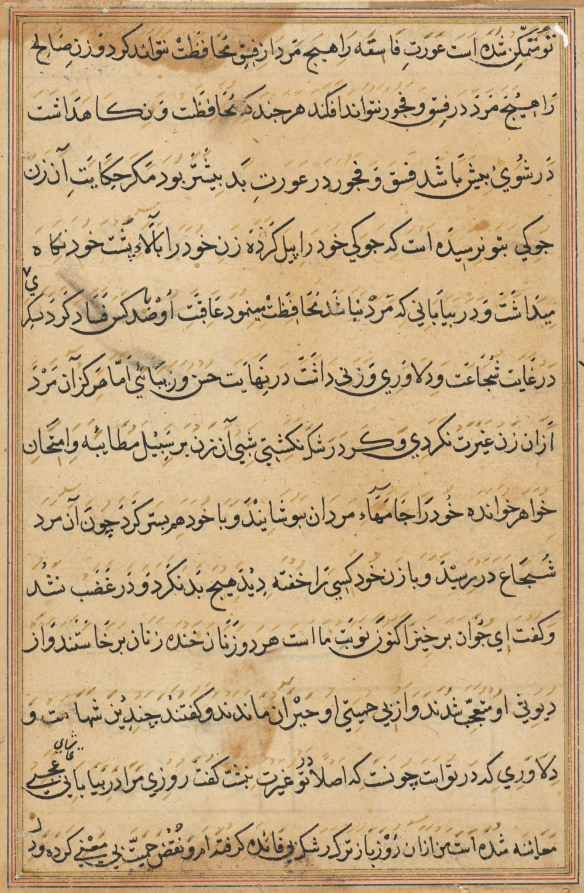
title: Page from Tales of a Parrot (Tuti-nama): text page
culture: Mughal India, court of Akbar (reigned 1556–1605)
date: c. 1560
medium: gum tempera, ink, and gold on paper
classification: Painting